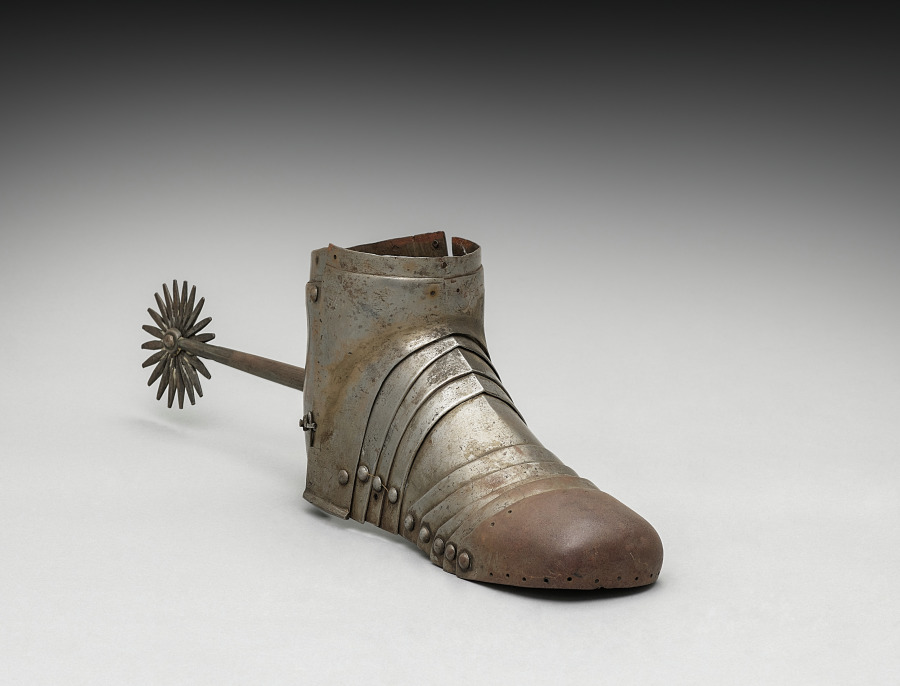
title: Left Sabatoun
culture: Germany, 19th century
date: 1801–1900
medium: steel with black paint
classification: Arms and Armor